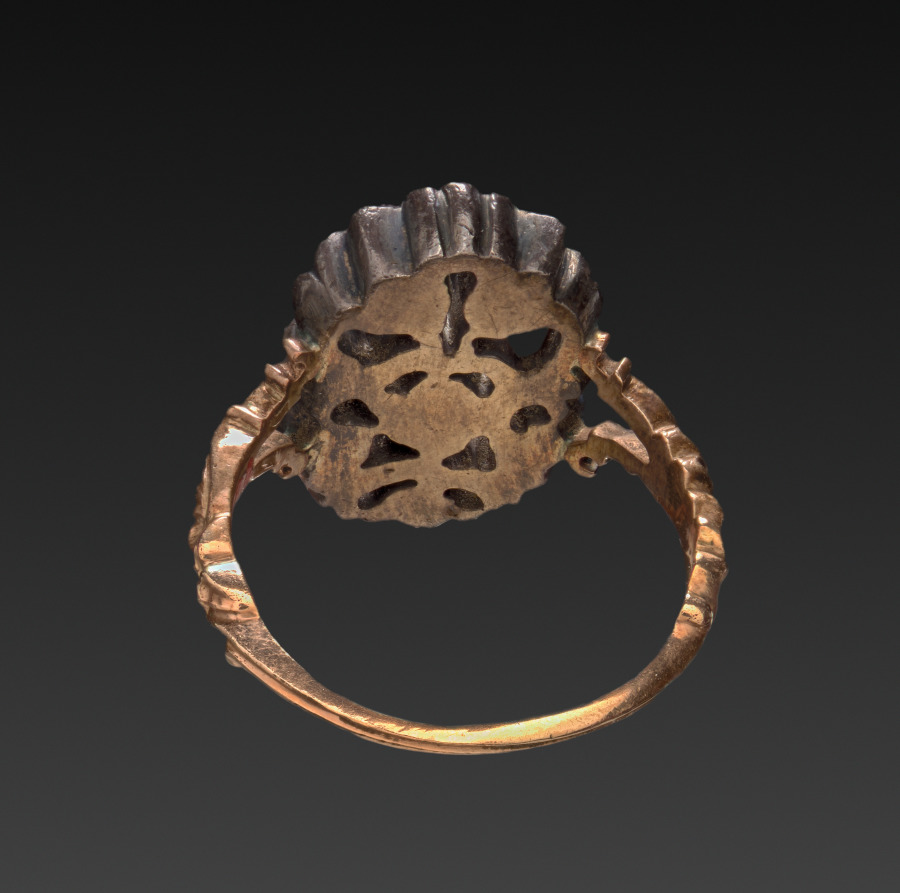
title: Ring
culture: Italy or France, 18th century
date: 1700s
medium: gold band, silver and enamel setting with diamond, ruby, emerald and garnet stones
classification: Jewelry